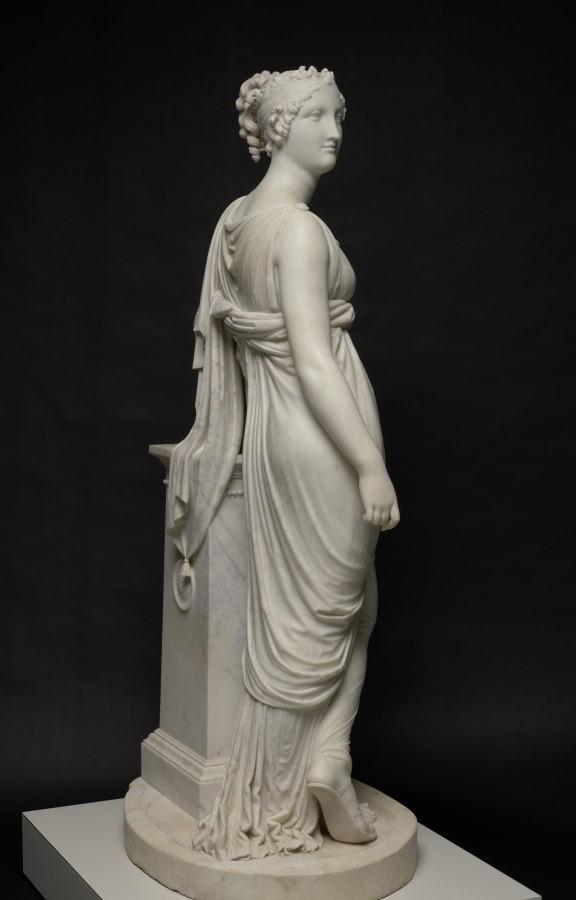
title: Terpsichore Lyran (Muse of Lyric Poetry)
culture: Italy, 19th century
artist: Antonio Canova (Italian, 1757–1822)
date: 1816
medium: marble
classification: Sculpture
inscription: inscribed on front of column: "Terpsichore Lyran" [Terpsichore as the Muse of lyric poetry]; inscribed at base of column: "Canova Fact: 1816"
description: In Greek mythology, Terpsichore was one of the nine Muses, or goddesses of creative inspiration. The lyre, the Greek inscription on the short column, and the caduceus (entwined snakes) on the side identify the figure as Terpsichore Lyran, muse of lyric poetry. This sculpture began with a commission from Napoleon's brother, Lucien, for an idealized portrait of his wife, Alexandrine. Antonio Canova made this version for a British aristocrat and exhibited it in 1817 at the Royal Academy in London to great acclaim.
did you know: Trained by his grandfather, an Italian stonemason, Canova began modeling clay and carving marble sculptures before age ten.